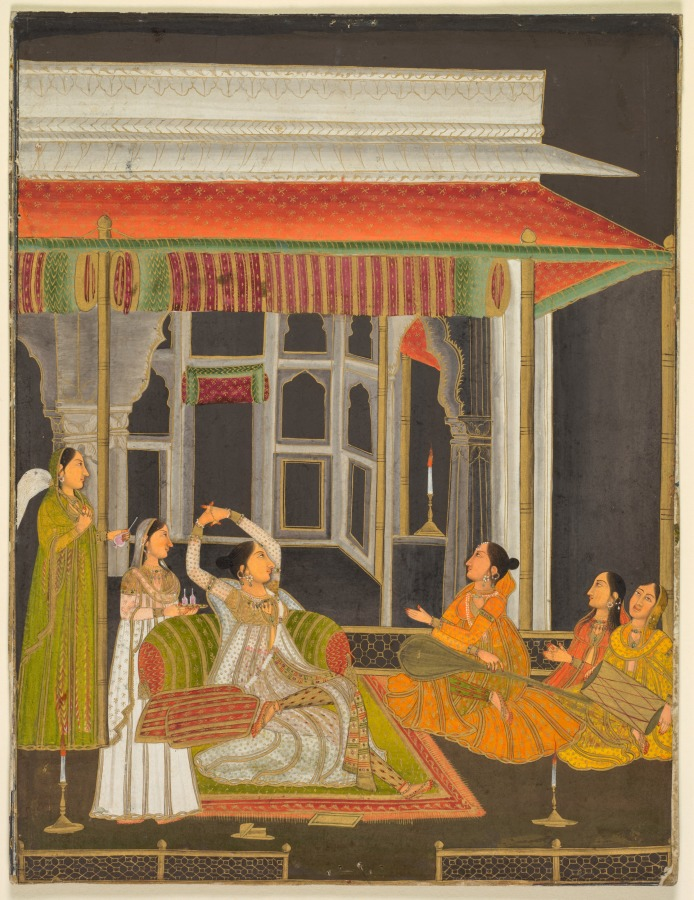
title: A princess on a terrace with attendants at night (recto); Calligraphy (verso)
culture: India, Farrukhabad, Mughal, 18th century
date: c. 1760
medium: Gum tempera, ink, and gold on paper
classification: Painting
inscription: verso: six lines of Persian poetry in nast 'aliq calligraphy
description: Before a terrace pavilion in the women’s quarters of a palace, a royal woman stretches to show off her figure in accordance with age-old Indian poetic imagery. Female musicians provide entertainment, and attendants hold bottles of wine at the ready. Scenes of enjoyment in sumptuous domestic spaces pervaded the artistic repertoire of the imperial court and regional centers of northern India throughout the late 1700s, following the themes set by the Mughal emperor Muhammad Shah.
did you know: Rolled-up textiles could be let down to enclose the space of an open pavilion.